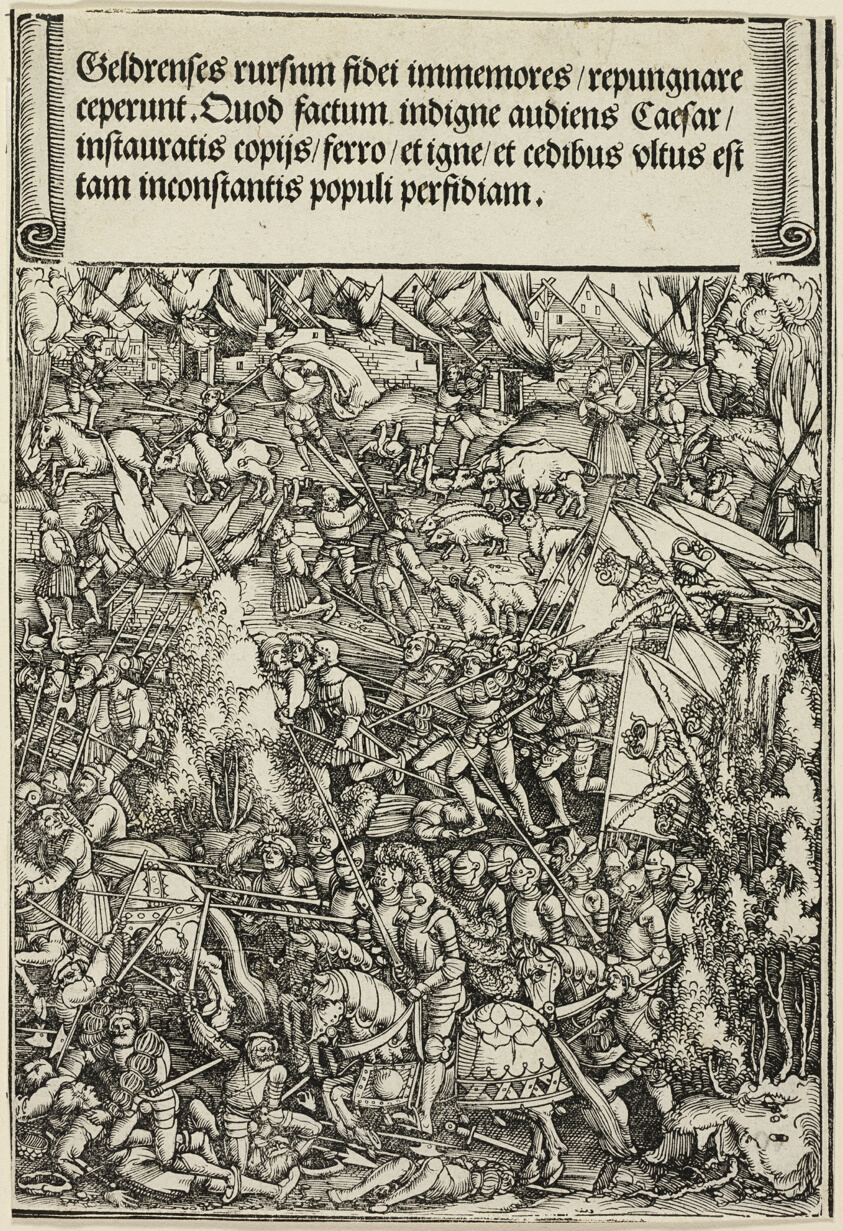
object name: Print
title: The Second War in Gueldres, from The Triumphal Arch of Maximilian I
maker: School of Albrecht Dürer (German, 1471-1528); probably Hans Springinklee (German, c. 1495-1522); possibly Wolf Traut (German, c. 1480-1520); printed by Hieronymus Andreae (German, died 1556)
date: 1515–17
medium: Woodcut in black on ivory laid paper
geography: Germany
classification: woodcut; print; prints and drawing; paper